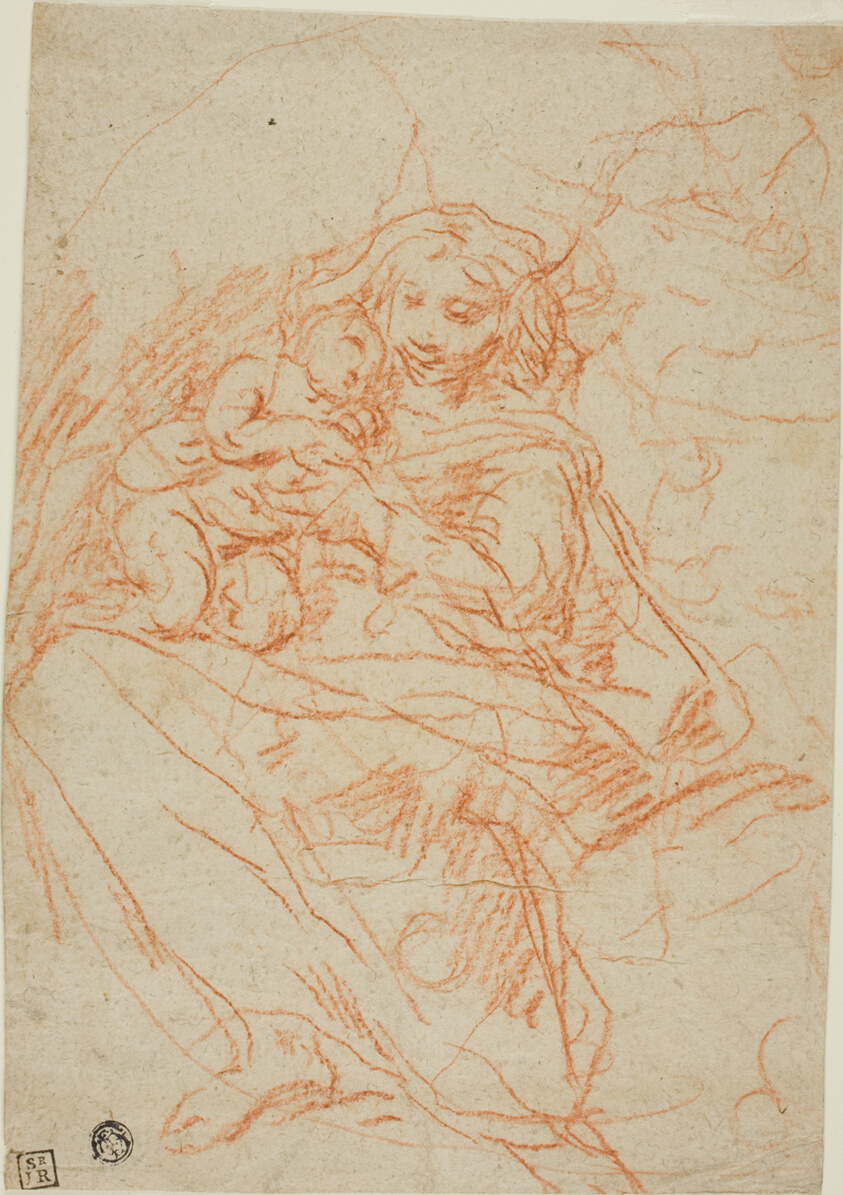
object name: Drawing and Watercolor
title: Virgin and Child (recto); Portion of Altarpiece Sketch (verso)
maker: Attributed to Flaminio Torre; Italian, 1621-1661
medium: Red chalk (recto) on gray-brown laid paper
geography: Italy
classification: chalk; drawings (visual works); prints and drawing